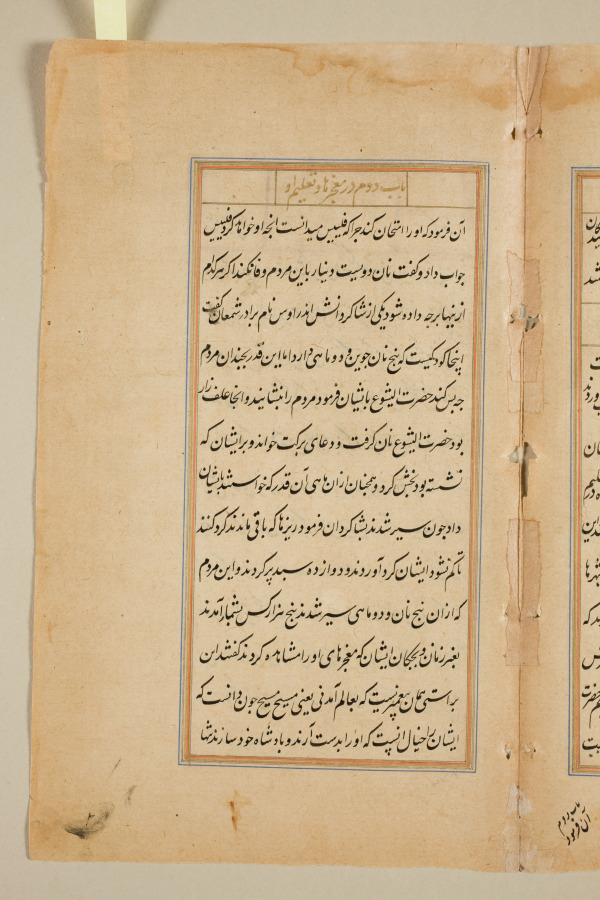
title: Text page from a Mirror of Holiness (Mir’at al-quds) of Father Jerome Xavier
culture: Mughal India, Allahabad, made for Prince Salim (1569–1627)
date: 1602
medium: Ink and gold on paper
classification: Manuscript